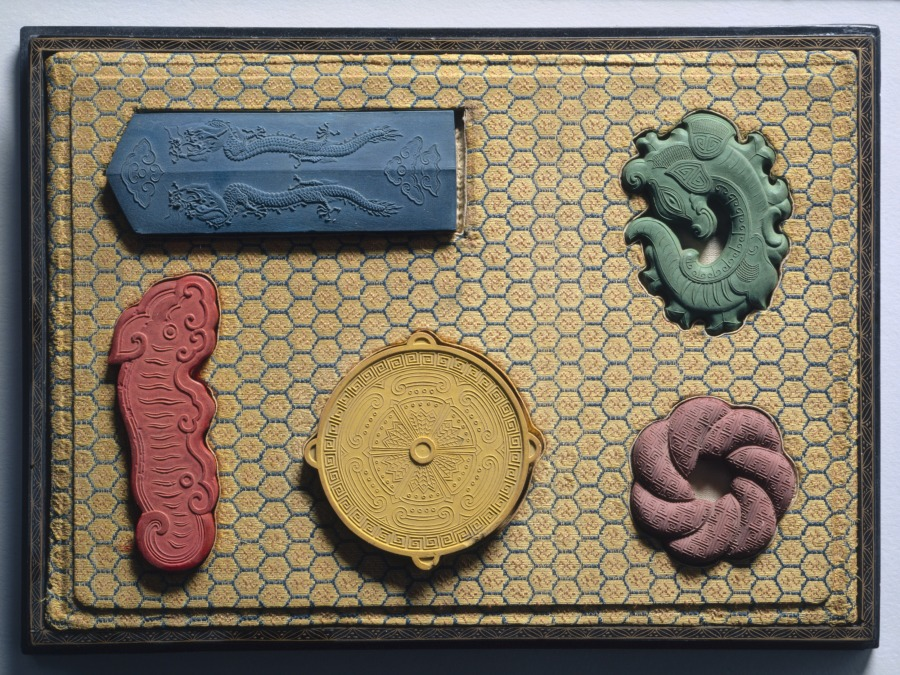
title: Box with Ink Cakes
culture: China, Qing dynasty (1644-1911), Jiaqing reign (1795-1820)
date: 1795–1820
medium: Lacquer and silk box; molded ink in red, yellow, blue, and green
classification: Lacquer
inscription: 江西巡撫臣陳淮恭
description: Ink cakes (also called ink sticks) are dissolved with the addition of water and then ground on the surface of a flat square stone into liquid ink for painting and calligraphy. The precious ink cakes here, however, have never been used. The inscription on the side of the blue Gui scepter-shaped ink cake says that the set was commissioned by Chen Huai, Governor of Jiangxi province. The green and bright red ink cakes take the forms of archaic dragons. The dull red ink cake resembles a brocade knot. The yellow cake shaped like the Buddhist "Wheel of the Law" is inscribed on the reverse.